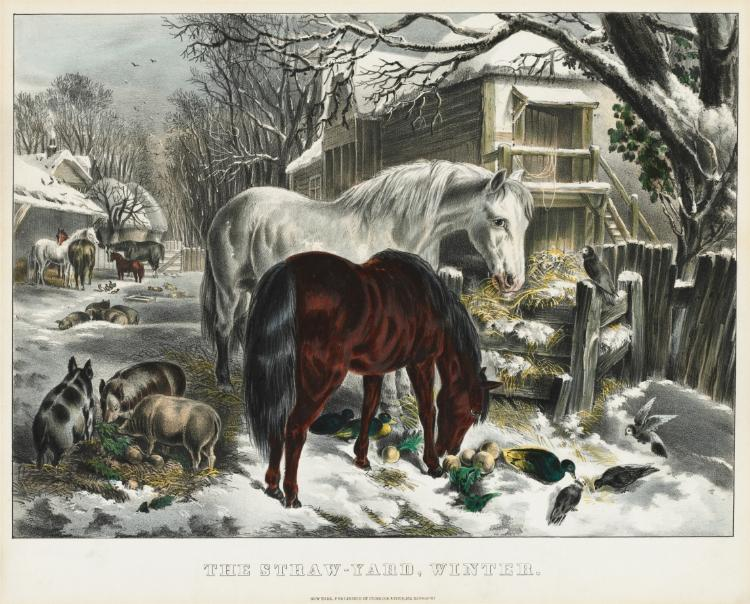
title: Straw-yard, Winter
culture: America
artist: and James Merritt Ives (American, 1824–1895)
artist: Nathaniel Currier (American, 1813–1888)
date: 1800s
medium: lithograph, hand colored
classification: Print